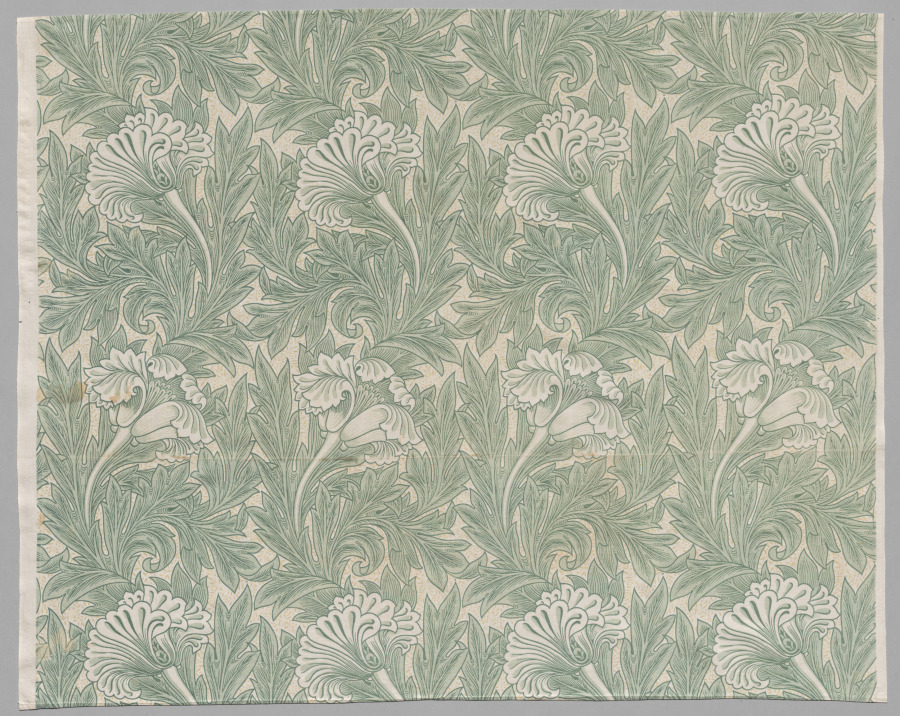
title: Tulip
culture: England, 19th century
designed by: William Morris (British, 1834–1896)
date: 1875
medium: roller printed cotton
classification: Textile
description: William Morris was a designer, craftsman, poet, novelist, businessman, and social activist. A doctor attributed his cause of death at age 62 to “simply being William Morris, and having done more work than most ten men.” His decorative arts firm Morris, Marshall, Faulkner & Co., known simply as Morris & Co. after 1875, designed and sold household furnishings that were sought after for their elegant, colorful patterns and high-quality materials. Morris insisted on producing goods under fair labor conditions, which set him apart from many Victorian manufacturers for whom industrialism meant imposing grueling hours for low wages in dangerous factories. During an age when rooms were stuffed with mass-produced objects and teeming with ornament, Morris challenged consumers to embrace harmony and restraint in decoration: “Have nothing in your houses that you do not know to be useful or believe to be beautiful.” Textiles were among the most profitable of the company’s merchandise and included embroidery, printed cotton, woven fabrics, tapestries, and carpets. Morris’s designs and working philosophy combined a vast knowledge of the past with a vision for the future. His final labor of love, the Kelmscott Press, was founded in 1890 and produced beautiful books with ornaments and typefaces that Morris designed. They were often illustrated by his friend Edward Burne-Jones and other artists. Morris wanted readers to enjoy the tactile experience of holding and reading from these volumes. Printed on high-quality linen paper, many are bound in vellum (animal skin). Their designs have much in common with books printed in the earliest years of the printing press.